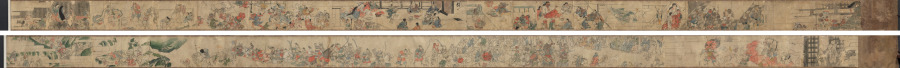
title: Oeyama Engi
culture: Japan, Edo period (1615–1868)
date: 1615–1868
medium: pair of handscrolls; ink and color on paper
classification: Painting